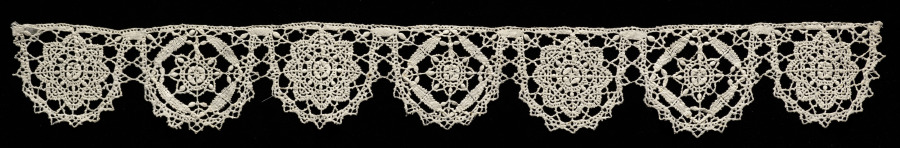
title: Lace Edging of Points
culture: Italy, Genoa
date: 1600s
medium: Bobbin lace (rose lace)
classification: Lace